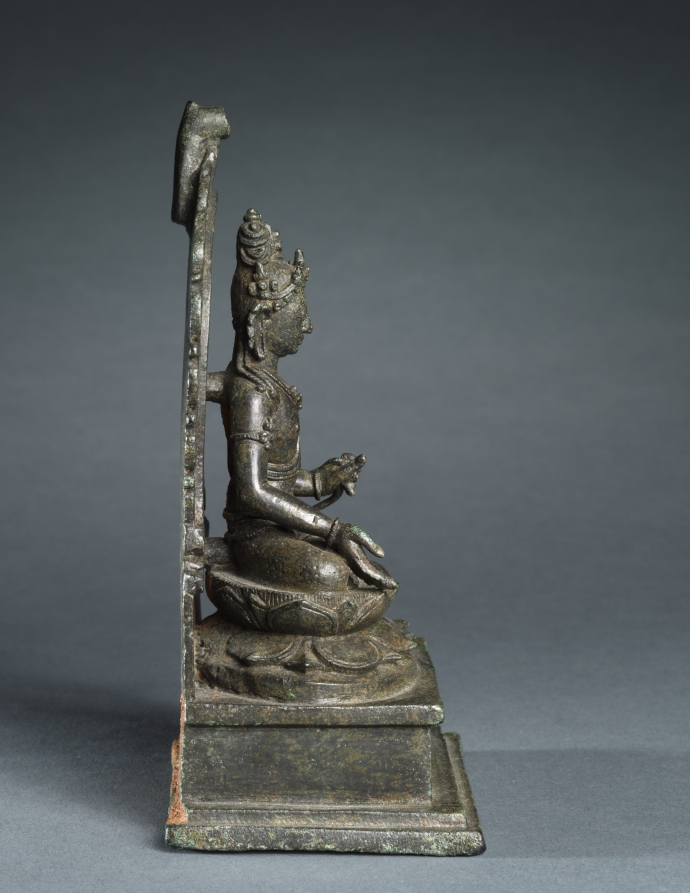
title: Seated Avalokitesvara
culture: Central Java, 9th century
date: 800s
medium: bronze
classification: Sculpture